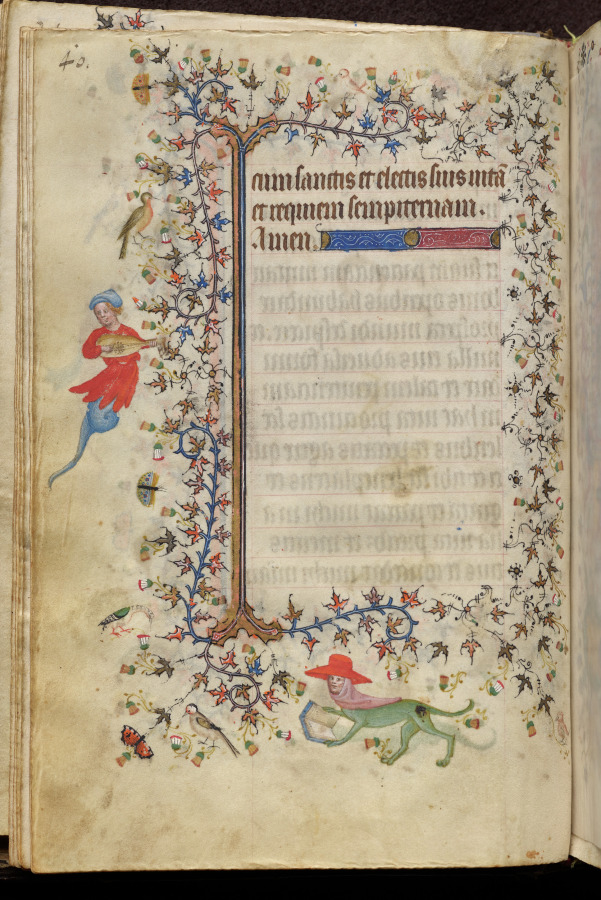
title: Hours of Charles the Noble, King of Navarre (1361-1425): fol. 20v, Text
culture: France, Paris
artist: Master of the Brussels Initials and Associates (French)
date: c. 1405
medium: ink, tempera, and gold on vellum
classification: Bound Volume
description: This precious volume was obviously highly prized by its owner, the French-born King of Navarre, who had his coat of arms painted on no less than twenty folios. Rather than directly commissioning this manuscript from a specific workshop, it seems that Charles the Noble acquired his book of hours -- perhaps ready-made for the luxury market -- while on a trip to Paris in 1404-05. A collaborative effort, six painting styles are evidenced within the pages of this codex, those of two Italians, two Frenchmen, and two Netherlanders. The painter who was responsible for the planning and decoration of the book, and who produced seventeen of the large miniatures, was a Bolognese artist known as the Master of the Brussels Initials. His principal assistant, responsible for most of the borders, was a Florentine who signed his name "Zecho" da Firenze on folio 208 verso.